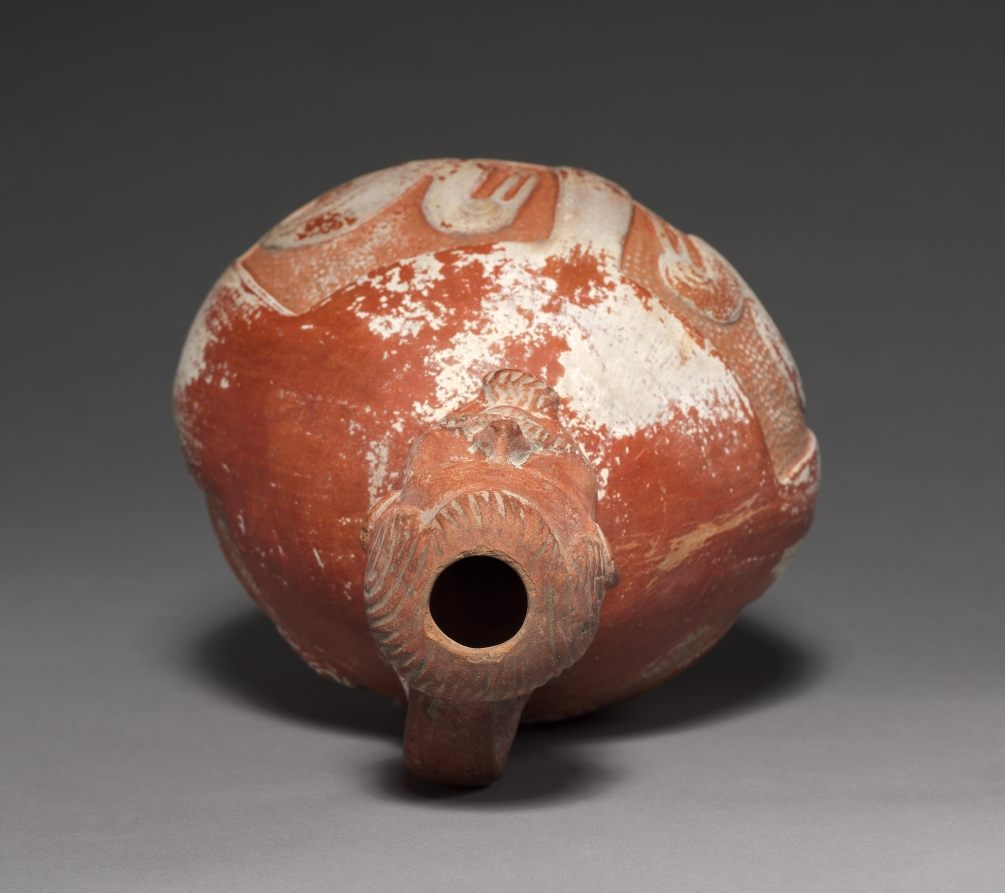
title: Urn or Jug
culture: Peru, 16th century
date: 1532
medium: pottery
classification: Ceramic